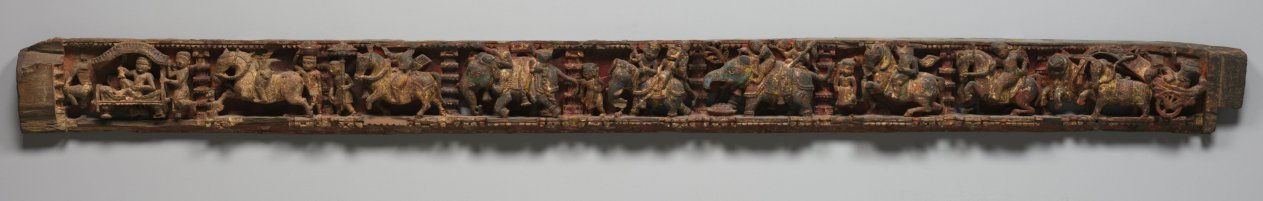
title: Narrative Frieze: Procession with Dignitary in a Palanquin Architrave from a Jain Temple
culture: India, Gujarat, 16th-17th century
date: 1500s-1600s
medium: wood with traces of color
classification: Sculpture